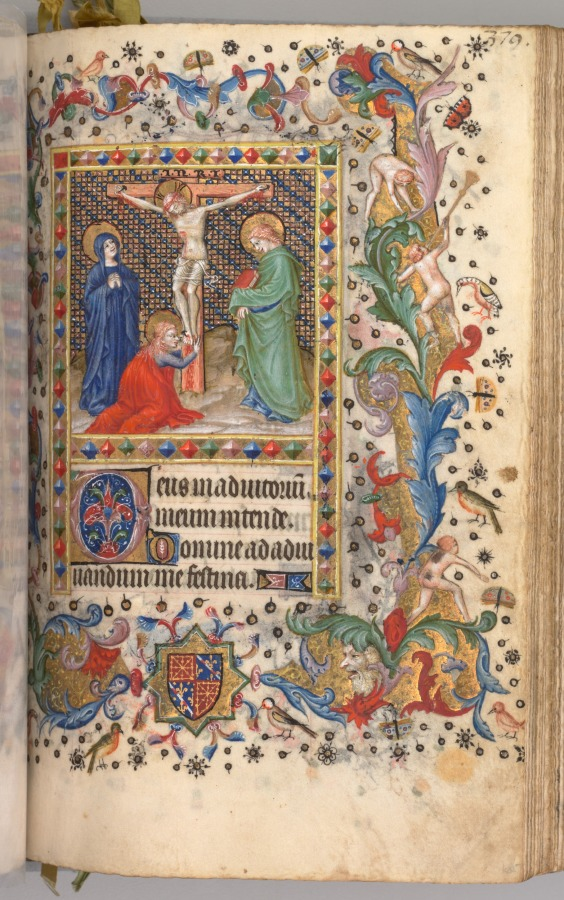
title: Hours of Charles the Noble, King of Navarre (1361-1425): fol. 185r, Crucifixion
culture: France, Paris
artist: Master of the Brussels Initials and Associates (French)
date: c. 1405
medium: ink, tempera, and gold on vellum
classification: Bound Volume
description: This precious volume was obviously highly prized by its owner, the French-born King of Navarre, who had his coat of arms painted on no less than twenty folios. Rather than directly commissioning this manuscript from a specific workshop, it seems that Charles the Noble acquired his book of hours -- perhaps ready-made for the luxury market -- while on a trip to Paris in 1404-05. A collaborative effort, six painting styles are evidenced within the pages of this codex, those of two Italians, two Frenchmen, and two Netherlanders. The painter who was responsible for the planning and decoration of the book, and who produced seventeen of the large miniatures, was a Bolognese artist known as the Master of the Brussels Initials. His principal assistant, responsible for most of the borders, was a Florentine who signed his name "Zecho" da Firenze on folio 208 verso.